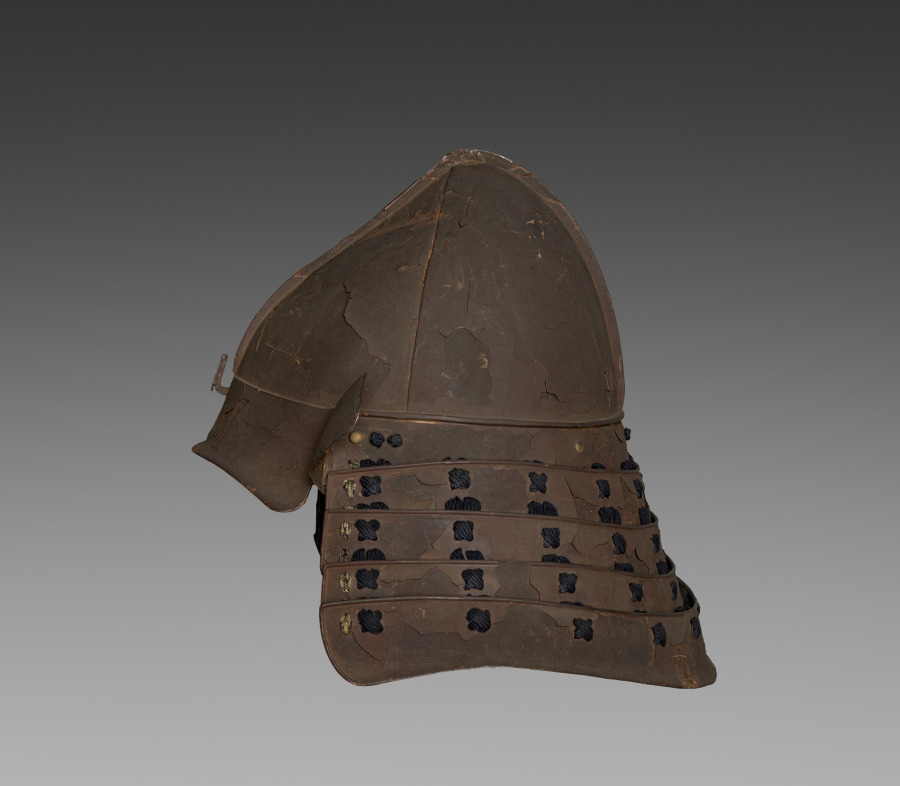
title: Helmet (Kabuto)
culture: Japan, Edo period (1615–1868)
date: 1615–1868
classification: Arms and Armor